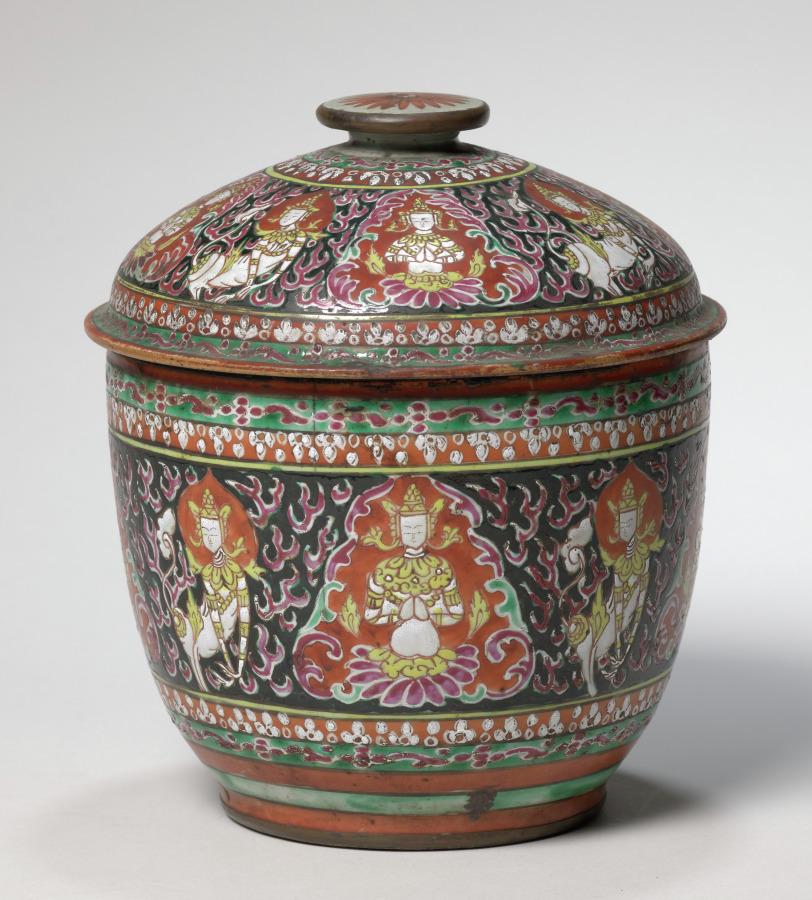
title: Jar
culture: Siam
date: 1800s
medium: porcelain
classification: Ceramic